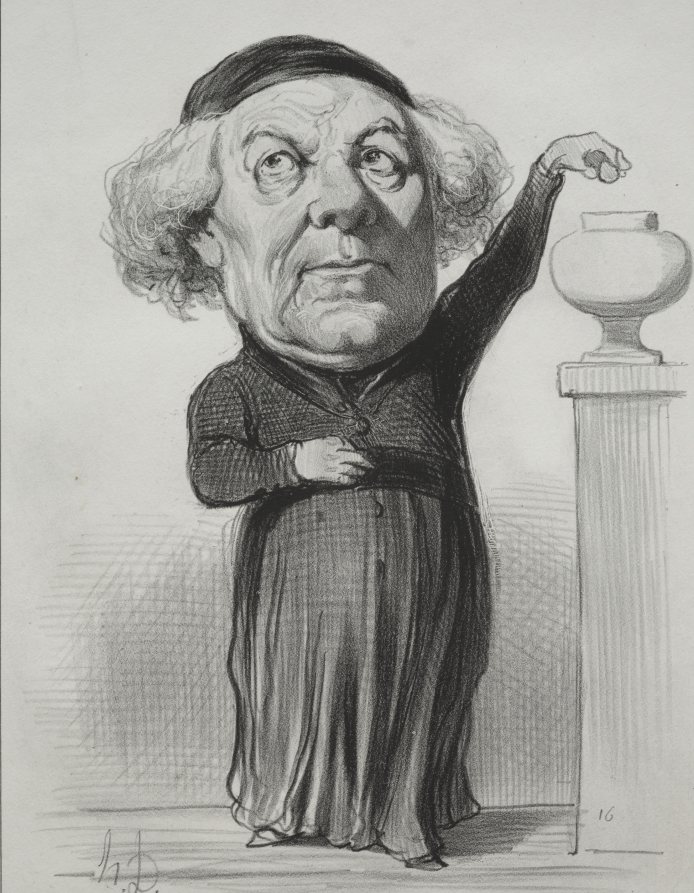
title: Jean Jacques Fayet, Bishop of Orléans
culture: France, 19th century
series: The Representatives Represented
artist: Honoré Daumier (French, 1808–1879)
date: 1849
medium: lithograph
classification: Print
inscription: Upper margin, in pencil: HD. 74 / RRR ; lower margin, in pencil: Fayet (D.) (seule connue) ; verso, in pencil: n 06-c / Fayet (J.J.) / Évêque d'Orleans / né'à membre le 26 juillet 1786 ; museum stamp ; black stamp: bliss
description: This rare print was intended for the series The Representatives Represented but was never published.